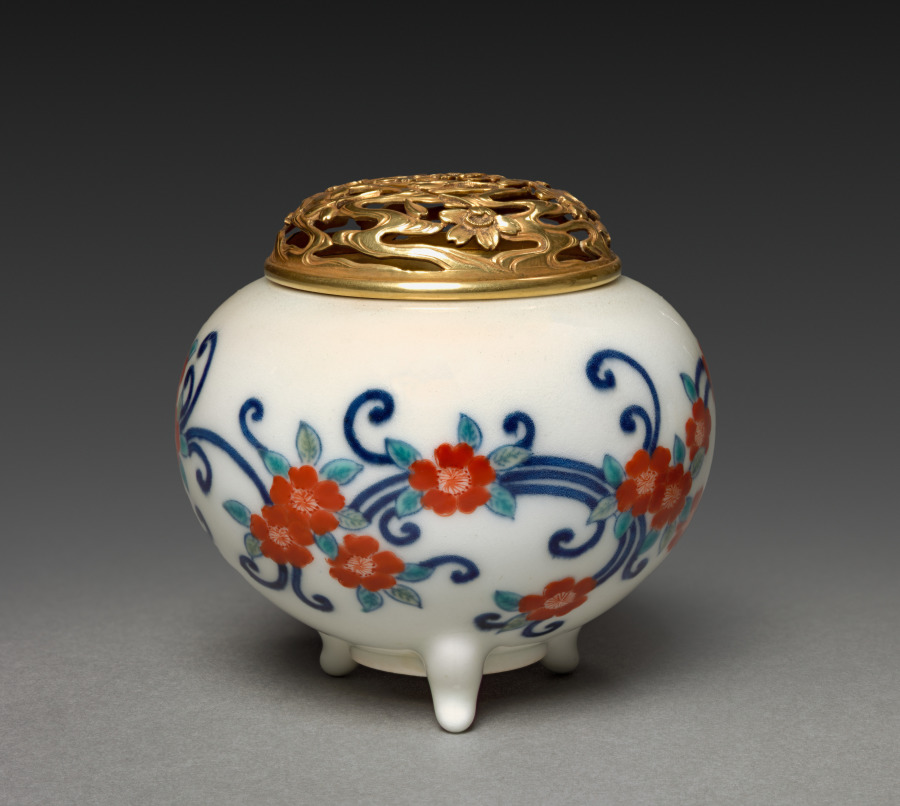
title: Incense Burner with Floral Scroll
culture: Japan, Edo period (1615–1868)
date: early to mid-1800s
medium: Porcelain with underglaze blue and overglaze color enamel (Hizen ware, Nabeshima style)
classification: Ceramic